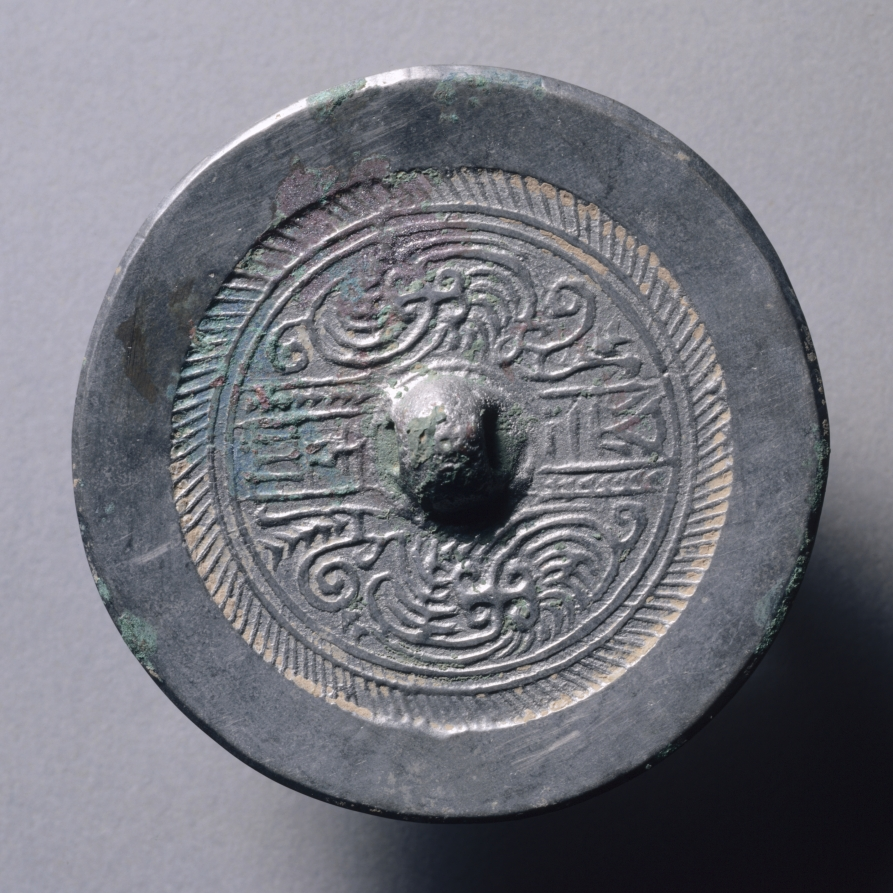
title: Mirror with Quatrefoil, Paired Phoenixes, and Auspicious Animals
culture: China, Eastern Han dynasty (25–220 CE)–Western Jin dynasty (265–316)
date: 25–316 CE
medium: bronze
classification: Metalwork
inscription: 位至三公